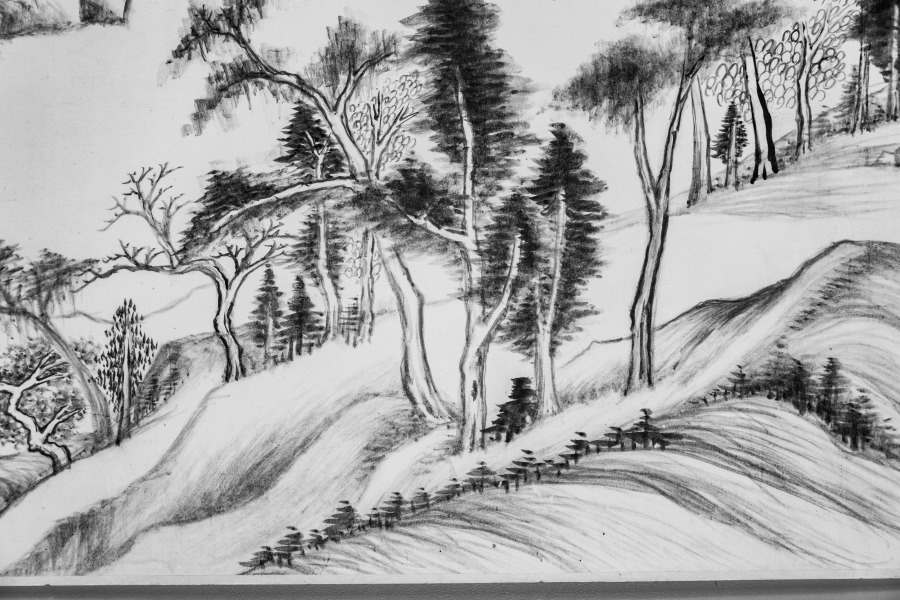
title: River and Mountains on a Clear Autumn Day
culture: China, Ming dynasty (1368–1644)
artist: Dong Qichang (Chinese, 1555–1636)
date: c. 1624–27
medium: Handscroll; ink on Korean paper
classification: Painting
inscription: 黃子久江山秋霽似此，當恨古人不見我也。思翁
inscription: 董文敏每遇高麗鏡面箋，書畫尤為入神。此卷改表紙用之，字跡隱然，兼有朝鮮之印。至於筆法圓秀，真接倪黃。豈文沈所可同日而語也。 康熙庚午中秋後一日，天氣澄爽，重裝初畢，跋於瓶廬。抱瓮翁高士奇。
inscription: Second inscription by Gao Shiqi 高士奇 (1645–1704): On the twenty-third day of the ninth month, the jiaxu year of the Kangxi era [1694], I packed my bags to head north. When my boat passed Wuchang [Suzhou], Mr. Mantang [Song Luo] brought wine to bid me farewell so that we could share our thoughts on our separation in the last few years. I showed him the paintings and calligraphy which I collected and asked his opinions. Since Mr. Mantang does not own any handscrolls by Wenmin [Dong Qichang], I leave this one for him in commemoration of our parting; thus the painting will have a worthy owner and our meeting will become a beautiful story in the future. It is the fourth day after the beginning of winter, with the sky clear and sober. Trees under frost have turned red and yellow, seemingly echoing the brush and ink in the painting. I also ask Mr. Mantang to inscribe a poem to commemorate our meeting so that it will survive forever.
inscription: 1 colophon and 4 seals of Song Luo 宋犖 (1634–1713): Who is the foremost art connoisseur of our dynasty?/ Tangcun [Liang Qingbiao, 1620–1691] is dead, so the title passes to Jiangcun [Gao Shiqi]./ Leaving office, you retired for five years in the Lake region./ Fondling handscrolls and hanging scrolls from morning to evening./ You sent me your collection catalogue Xiao Xia Lu last year;/ It is indeed the true equal of [Zhou Mi's] Yun Yan Guo Yan./ This year you returned to the capital by imperial order;/ Your boat with calligraphy and paintings anchored at the river bank in Suzhou./ When we met each other you did not waste any time for conversation by poured out immediately/ From your "coral net" extraordinary treasures./ You produced incomparable scrolls, with gold-inscribed labels and jade rollers,/ Pouring out from bags and trunks, they were spread in disarray./ Without a word, I rolled and unrolled until my fingers were numbed,/ We sat straight, facing each other quietly, and never felt tired./ For three days we forgot about sleeping and food./ And at times we shouted our joy out loud, forgetting who is host or guest./ Your Dwelling in the Fuchun Mountains and the Yuansheng manuscript/ These peerless works I myself examined with delight./ As an added pleasure to the farewell dinner under the Maple Bridge,/ You allowed me to hold again this handscroll by Dong Qichang--/ The Misty River and Piled Peaks [by Zhao Mengfu] and this Clear Autumn Day are two extraordinary masterpieces./ In showing such life and spirit with "qi yun." the artists were truly "men of heaven."/ The Clear Autumn Day is not even three feet long,/ Painted on tributary Korean paper, it shines like silver./ Every building up and every turn of the mountains imitates nature,/ Every tree and every rock is removed from the commonplace./ From the beginning, the theory of poetry is the theory of painting,/ Like the lotus and the morning sunshine, they complement and refresh each other./ The artist's inscription regrets that "the Old Masters cannot see my scroll."/ Huang Gongwang would have agreed in his grave./ The vermilion of the seals glitter and dazzles the eyes,/ These added accessories are as valuable as jade./ You are very kind to give it to me,/ The feelings expressed in your inscription are so sincere./ Wanting to refuse, but unable, I accept it to respect your wish,/ And taking off my gown and cap I wrapped it with care./ You asked me to write a long poem in commemoration of this beautiful occasion,/ I am too ashamed that my effort in response is so poor and inadequate./ Returning home, I unrolled it under candlelight, trying to write the colophon,/ The light of the waning moon shines at the foot of the mossy wall./ Earnestly humming and brows knit in deep thought, I try to compose;/ The verses are not outstanding, but the facts are real./ With this poem recorded at the end of the scroll, I mail it to you for approval,/ This poem and this painting shall outlast a thousand springs. (Translation by LYSL/HK/WKH)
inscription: 1 colophon and 2 seals of Shao Changheng 邵長蘅 (1637–1704); 2 inscriptions and 14 seals of the Qianlong 乾隆 emperor (r. 1736–95); 1 seal of the Jiaqing 嘉慶 emperor (r. 1796–1820); 3 seals of the Xuantong 宣統 emperor (r. 1908–11); 1 seal unidentified.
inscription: [印] 朝鮮國王之印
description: Dong Qichang had a tremendous impact on the artistic practices and historiography of later generations; his works and writings shaped literati aesthetics. Here, Dong places an abstract landscape composition diagonally across the picture plane, configured to recall earlier masters and simultaneously express his own personal style. Dong’s inscription claims, Huang Gongwang’s Autumn Day, looks like this. I truly regret the master has not seen my work. In fact, Dong Qichang may have had Dong Yuan’s Xiao and Xiang Rivers in mind, a work he owned and considered a key work in Chinese art history.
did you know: The painting has an imprint of a Korean seal that reads "Seal of the king of Joseon."